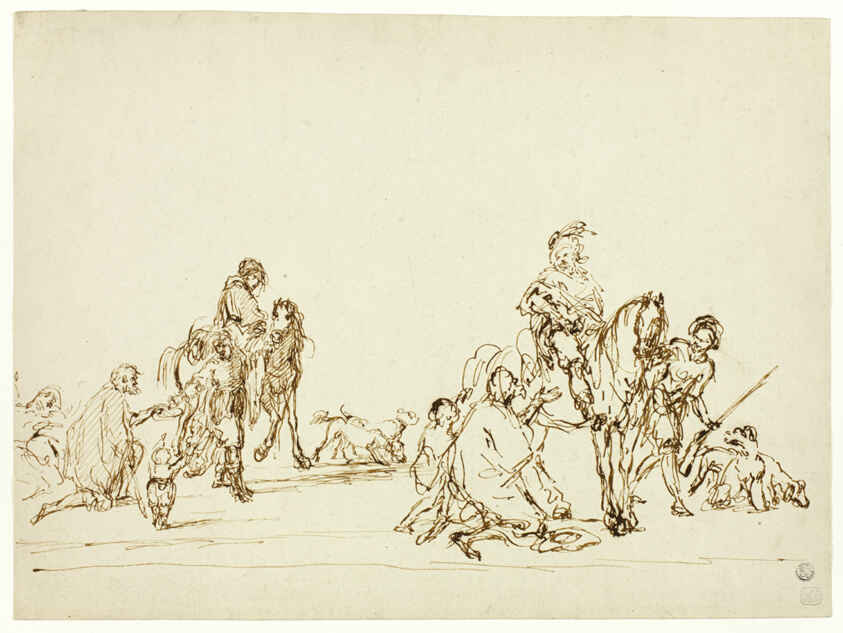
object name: Drawing and Watercolor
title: Hunters Giving Alms to Beggars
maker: Attributed to Carel van Falens; Flemish, 1683-1733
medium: Pen and brown ink on ivory laid paper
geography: Flanders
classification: pen and ink drawings; drawings (visual works); prints and drawing